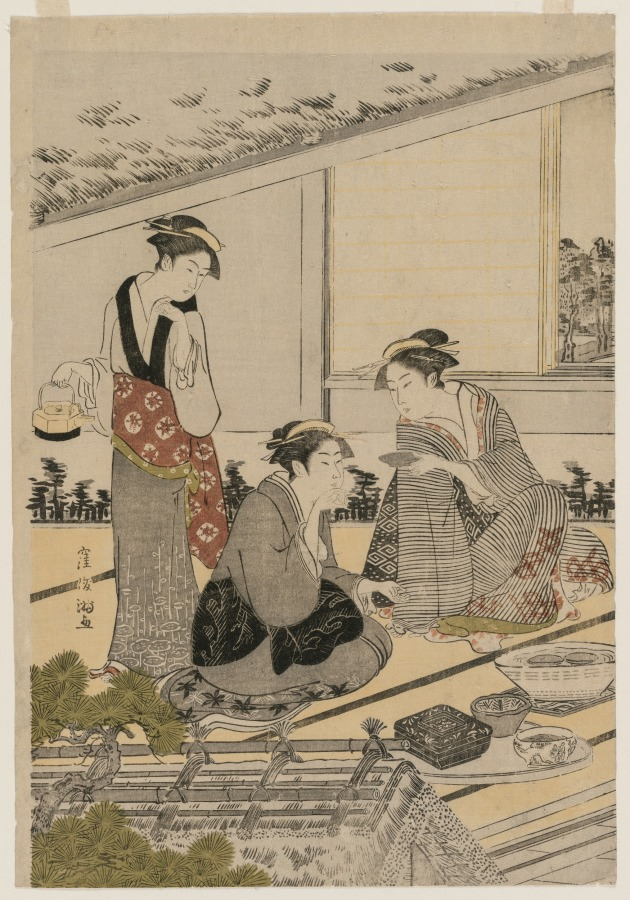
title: Women in a Tea House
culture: Japan, Edo period (1615–1868)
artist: Kubo Shunman (Japanese, 1757–1820)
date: late 1780s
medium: color woodblock print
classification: Print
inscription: Signature: Kubo Shumman ga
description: This elegant print provides a glimpse into the private life of the courtesan, recording a quiet moment of enjoying tea. Shunman often depicted bijin (beautiful women) in a landscape setting, using subdued color harmonies featuring grays, pale green, and pale purple. In addition to being a printmaker, Shunman was also an accomplished painter, poet, and skilled worker in metal inlay and lacquer.